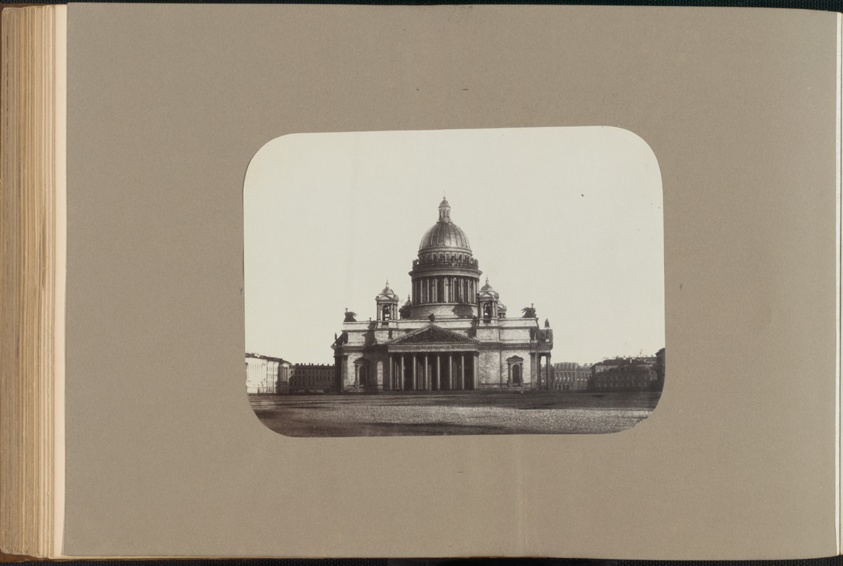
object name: Photograph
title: The Madame B Album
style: 19th century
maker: Marie-Blanche Hennelle Fournier (French, 1831–1906)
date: 1870s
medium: Albumen print (in album)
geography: France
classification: photograph; albumen silver print; photography